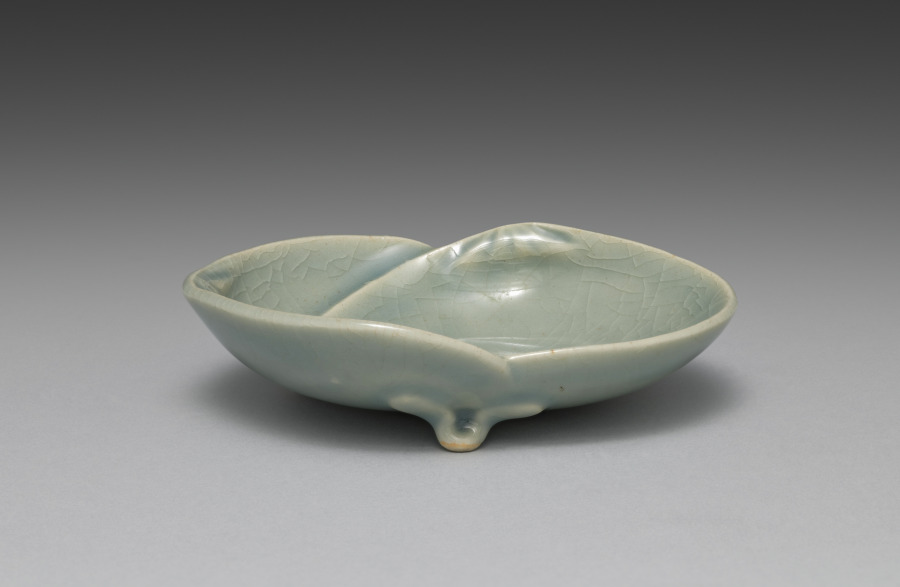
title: Dish from Saucers with Matching Shells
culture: Japan, Meiji period (1868–1912)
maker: Seifū Yohei III (Japanese, 1851–1914)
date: 1893–1914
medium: Porcelain with molded design and green crackled glaze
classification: Ceramic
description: Yohei III’s main output for his sophisticated clientele was in the form of tea sets and dining sets. He created a range of dishes in green glazes. He often produced in pairs, sets of five, or sets of ten. The set of five dishes with a more complex form is described as having a “water-colored glaze” (mizuiroyū). These are shaped like clam half shells, a reference to a game in which shell halves painted with narrative scenes or a variety of motifs must be matched back together by the players. The dishes have molded details to articulate the shell forms, and the crackling across each shell adds another dimension to the surface. Each dish is set on three small feet, formed by a pinched piece of clay and attached to an unglazed area on the underside of the dish. Curiously, while four of the dishes are stamped with the artist’s mark, one has instead a signature carved into the base.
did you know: The saucers are meant to look like matched halves of clam shells in reference to a once popular game.